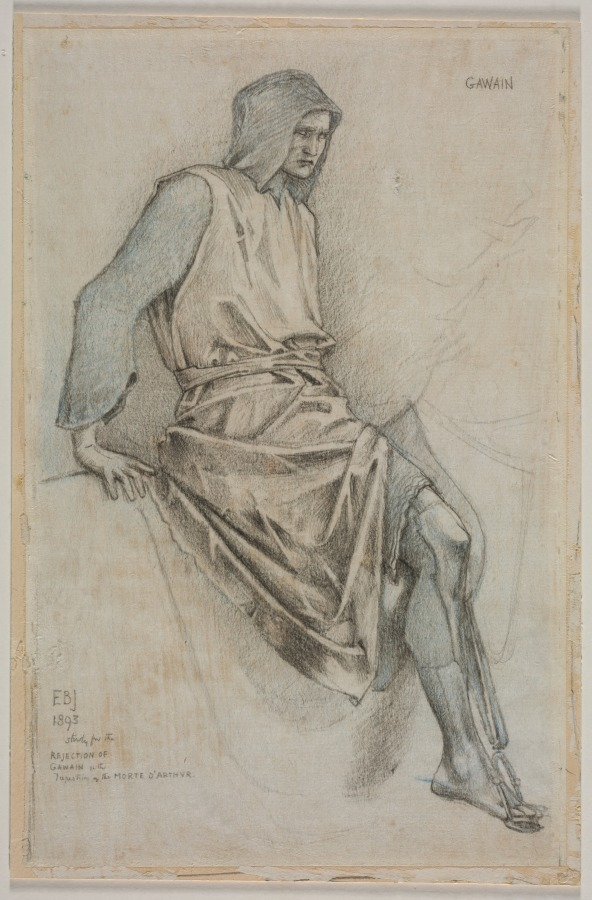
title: Study for the Failure of Gawain from the Holy Grail Tapestries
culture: England, 19th century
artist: Edward Burne-Jones (British, 1833–1898)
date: 1893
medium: black and blue crayons with graphite on light to medium-weight Japanese paper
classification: Drawing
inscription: inscribed, upper right in graphite: GAWAIN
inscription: inscribed lower left, in graphite: EBJ / 1893 / study for the / REJECTION OF / GAWAIN in the / Tapestries of the MORTE D'ARTHUR